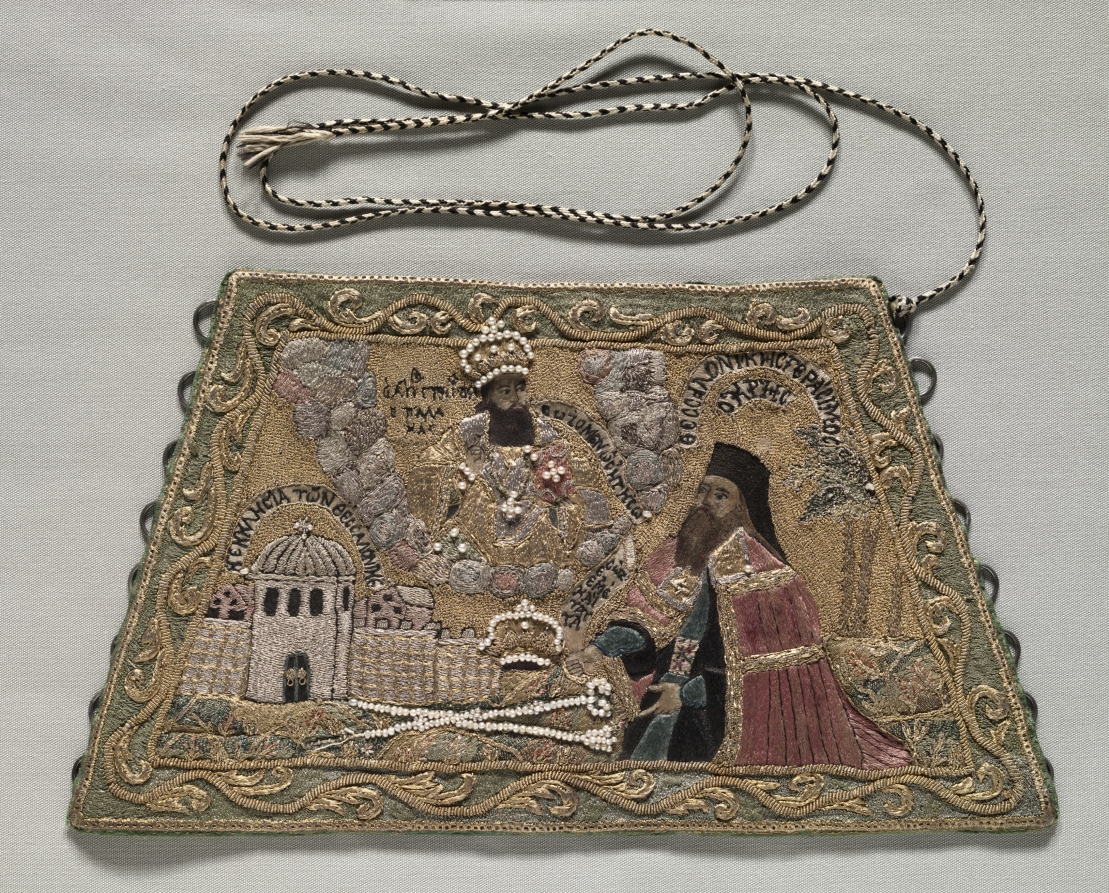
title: Ecclesiastical Embroidery (Epimanikion)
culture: Armenia or Greece, 18th century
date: 1700s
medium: embroidery: silk, gold and silver thread, pearls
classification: Embroidery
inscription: A priest deposes scepter and crown at the door of a church: "He ekklesia ton Thessalonike." The priest: "Thessalonikes Gerasimos" [OKRES (?)], appears in a cloud. An inscription in the cloud is indecipherable.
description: The scene represented seems to be a legend of the Orthodox Church: a priest eposes scepter and crown at the door of a church.